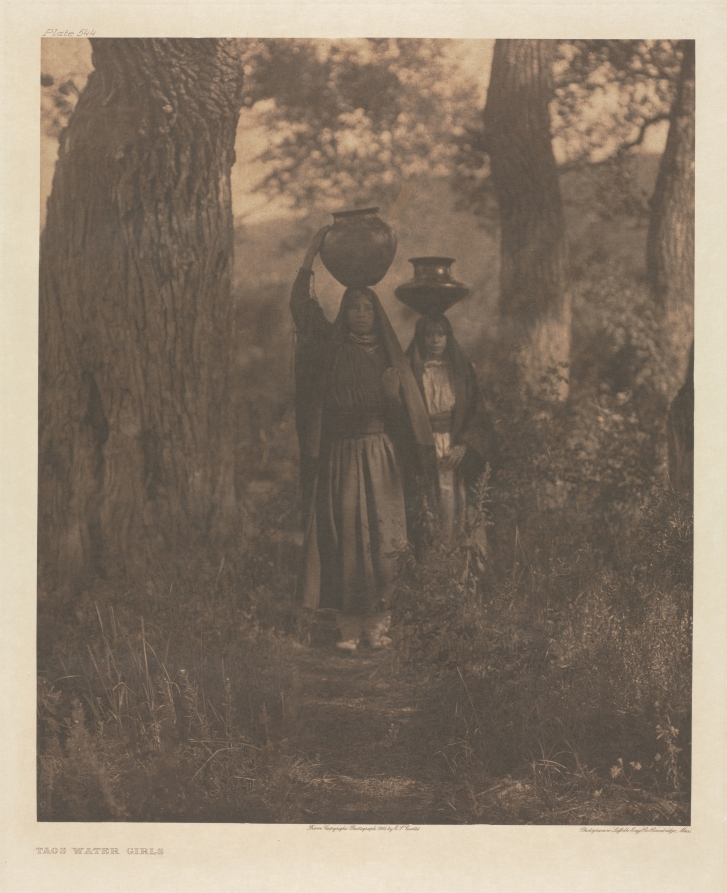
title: Portfolio XVI, Plate 544: Taos Water Girls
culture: America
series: The North American Indian: being a series of Portfolios picturing and describing the Indians of the United States, the Dominion of Canada, and Alaska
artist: Edward S. Curtis (American, 1868–1952)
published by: The University Press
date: 1905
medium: photogravure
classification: Portfolio